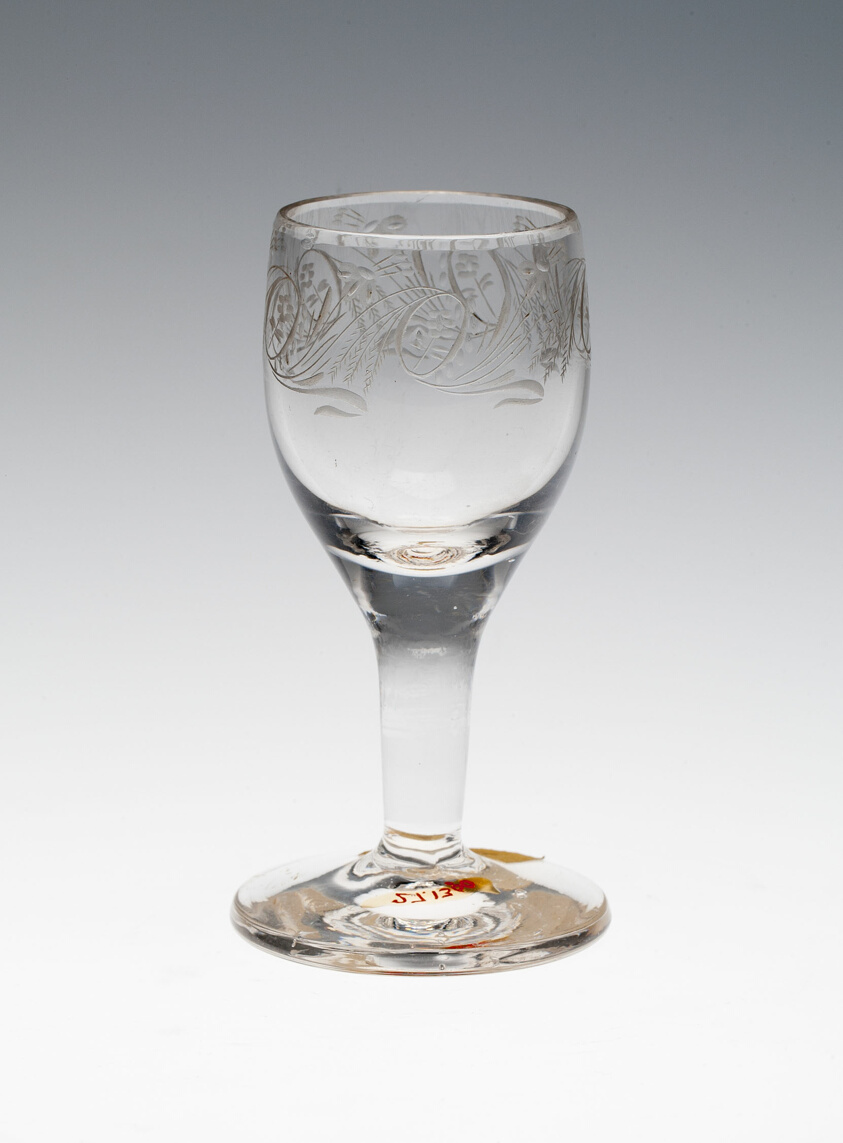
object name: Glass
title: Wine Glass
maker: England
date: c. 1780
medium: Glass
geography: England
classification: drinking vessel; glass; european decorative arts